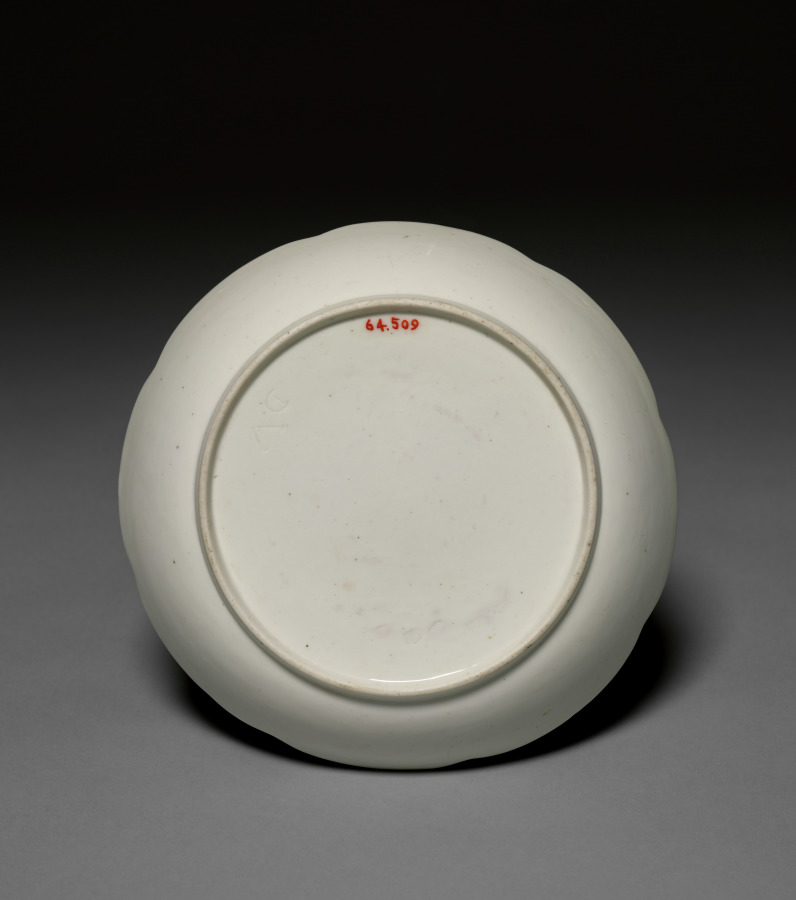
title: Bowl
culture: France, Mennecy, 18th century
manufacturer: Mennecy Factory (French)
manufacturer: Mennecy- Villeroy Factory (French)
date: c. 1765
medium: soft-paste porcelain with enamel and gilt decoration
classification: Ceramic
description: As European porcelain production advanced over the course of the 18th century, factories borrowed designs and techniques from one another in order to remain competitive in the porcelain market. This plate’s painted composition with two birds in the foreground, may have been inspired by bird paintings produced at the Vincennes porcelain factory beginning in the late 1740s.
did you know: The Vincennes porcelain factory’s royally supported monopoly for the creation of porcelain that emulated the German style forced the Villeroy factory to relocate to Mennecy in 1748.